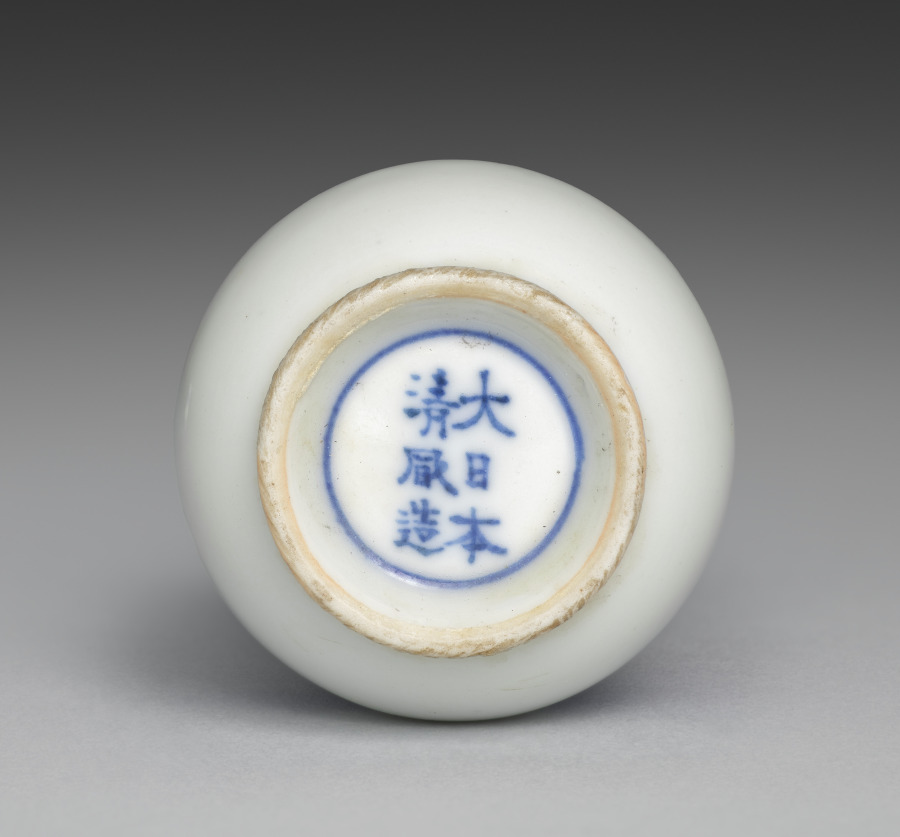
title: Cup from Sake Cups with Dragons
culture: Japan, Meiji period (1868–1912)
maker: Seifū Yohei III (Japanese, 1851–1914)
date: c. 1893–1914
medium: One from a set of six sake cups; porcelain with underglaze blue and iron oxide rims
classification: Ceramic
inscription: 大日本清風造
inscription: 清風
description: Each of these sake cups pictures two backward-looking dragons. The highly stylized creatures resemble jade carvings.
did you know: Seifū Yohei III was inspired by the Chinese mythical animals that were common on porcelain objects made at Jingdezhen in China during the Ming dynasty (1368–1644) and then exported around the world.